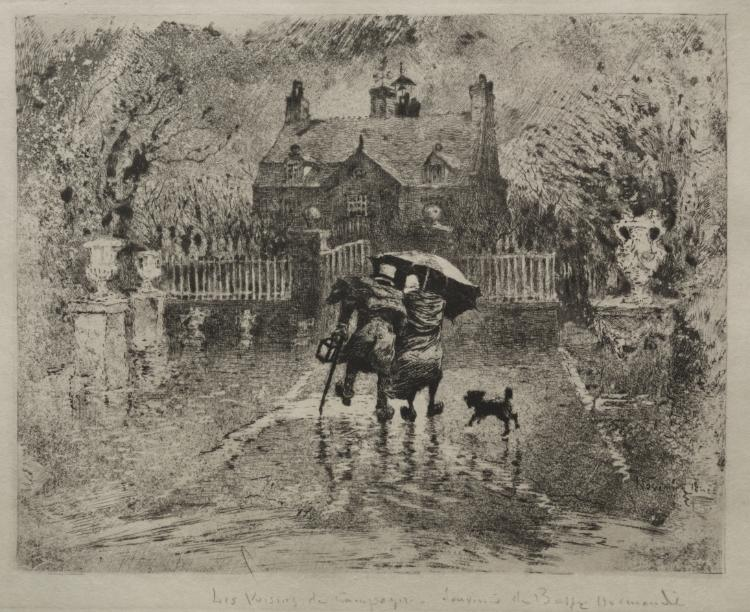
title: Country Neighbors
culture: France, 19th century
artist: Félix Hilaire Buhot (French, 1847–1898)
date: 1879–1880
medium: etching, drypoint and aquatint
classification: Print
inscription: in graphite: Les Voisins de Campagne Souvenir de Basse Normandie/ à Monsieuer Hadoing/ Felix Buhot